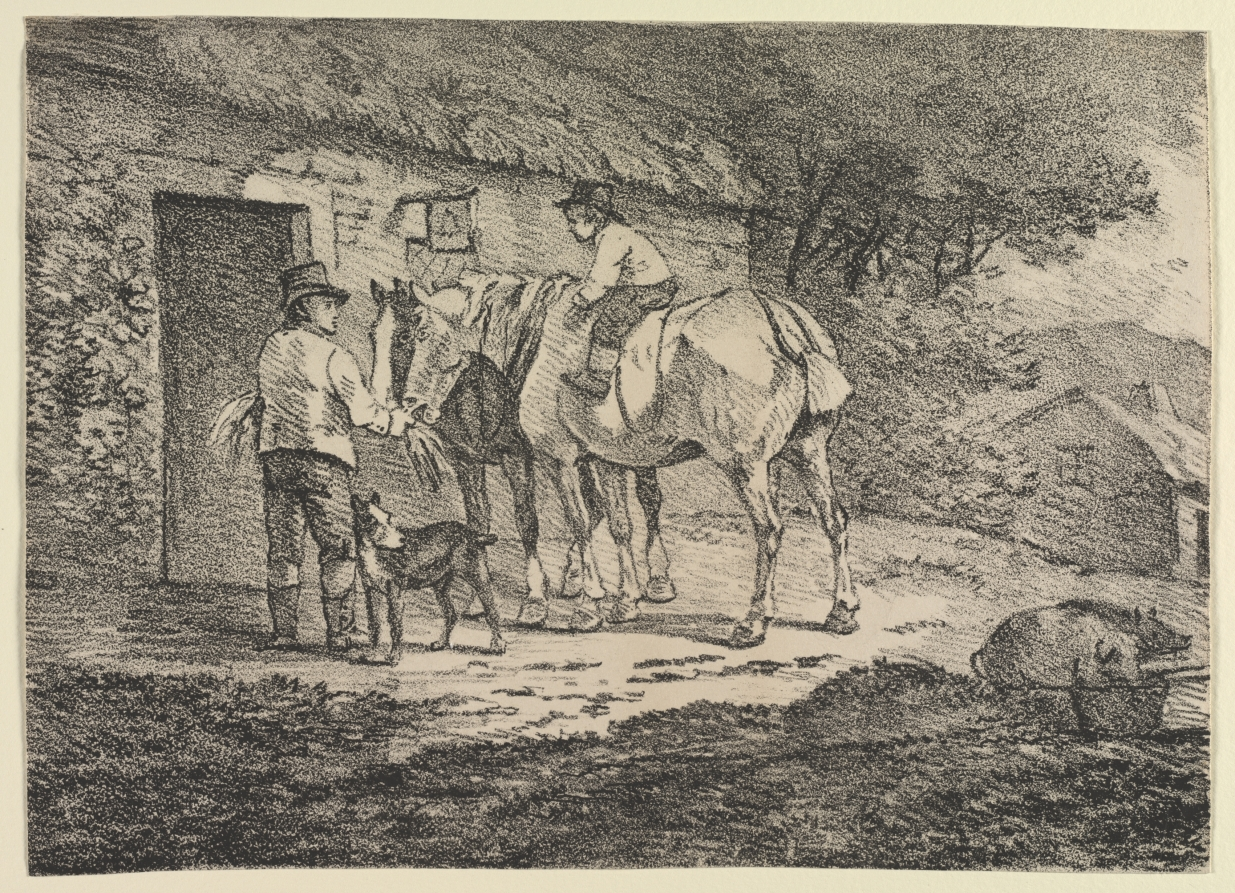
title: Specimens of Polyautography: Horses at a Cottage Door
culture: Switzerland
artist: Johann Conrad Gessner (Swiss, 1764–1826)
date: 1804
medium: lithograph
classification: Print